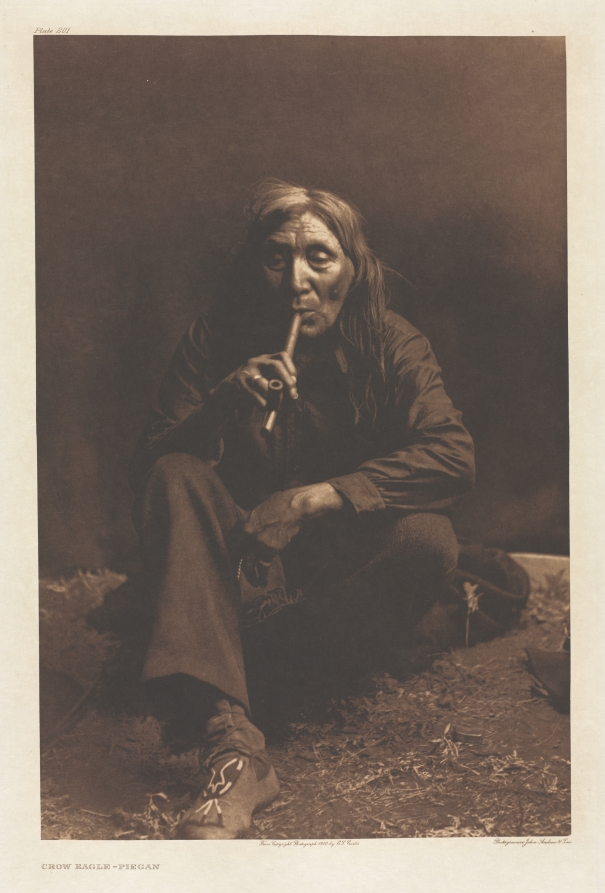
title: Portfolio VI, Plate 201: Crow Eagle--Piegan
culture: America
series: The North American Indian: being a series of Portfolios picturing and describing the Indians of the United States, the Dominion of Canada, and Alaska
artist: Edward S. Curtis (American, 1868–1952)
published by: The University Press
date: 1900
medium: photogravure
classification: Portfolio